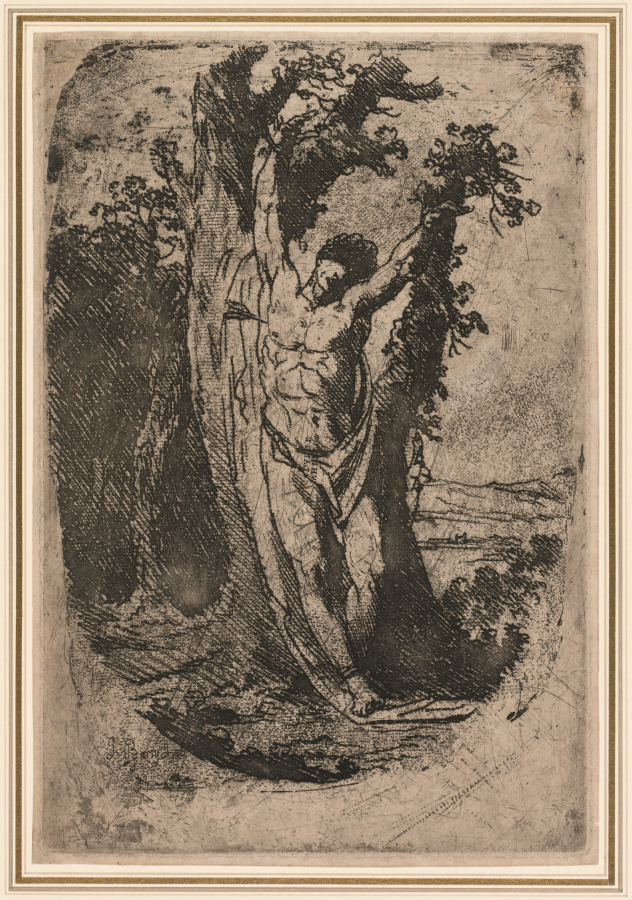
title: Saint Sebastian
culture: Ireland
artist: James Barry (Irish, 1741–1806)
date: c. 1776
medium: Soft-ground etching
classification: Print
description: Irish artist James Barry made drawings from the works of Michelangelo and other masters while in Rome between 1765 and 1771, at a time when studying from Renaissance masters in Italy was central to artistic training. The muscular body and twisting position of Saint Sebastian—who was martyred for his faith by being shot with arrows—recall Michelangelo’s dynamic male nudes. This is the only known impression of this print. Printed by Barry himself, it demonstrates his experimentation with soft-ground etching to imitate the effect of chalk drawing.